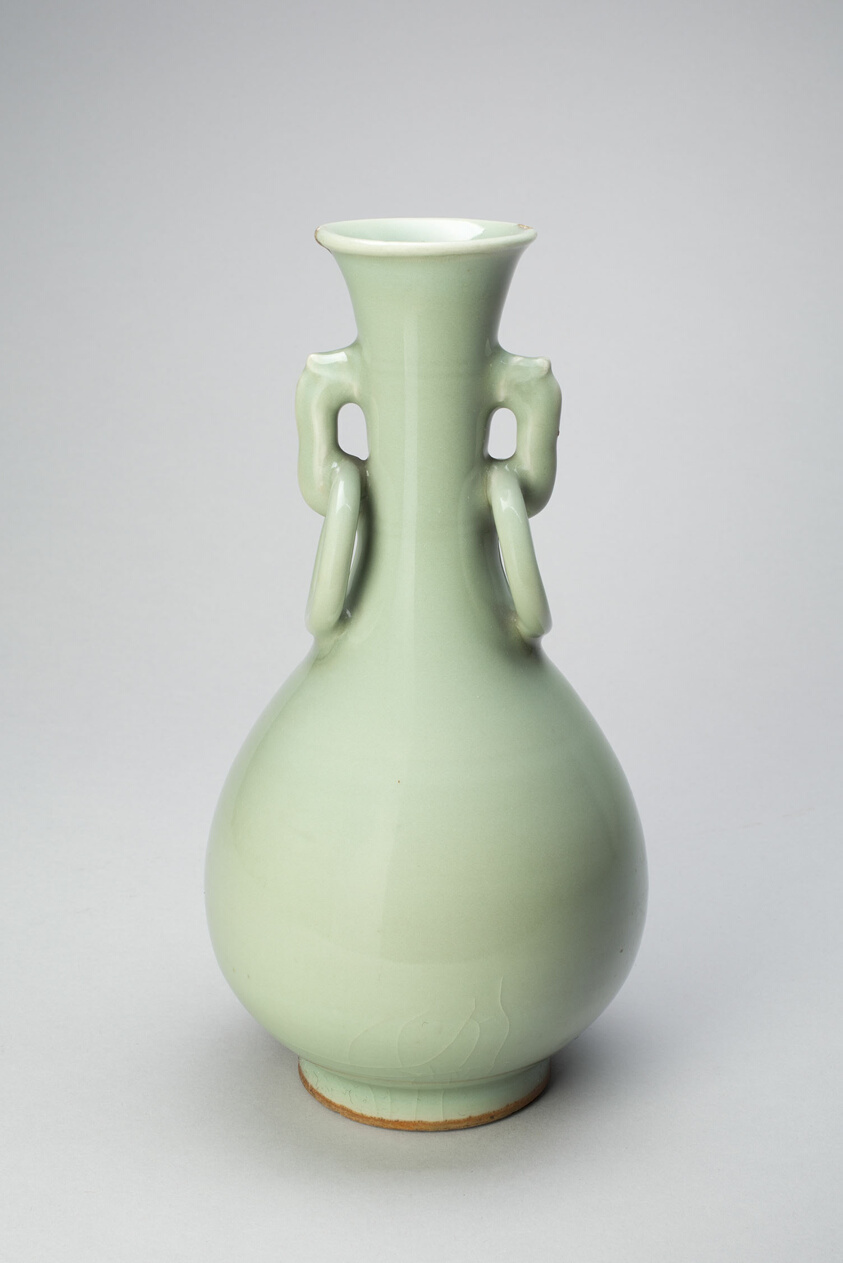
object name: Vessel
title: Pear-Shaped Vase with Dragon-Head Ring Handles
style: Chinese (culture or style)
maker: China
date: Yuan dynasty (1279–1368), 14th century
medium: Longquan ware; stoneware with molded decoration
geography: China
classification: vase; vessel; stoneware; asian art; ceramics